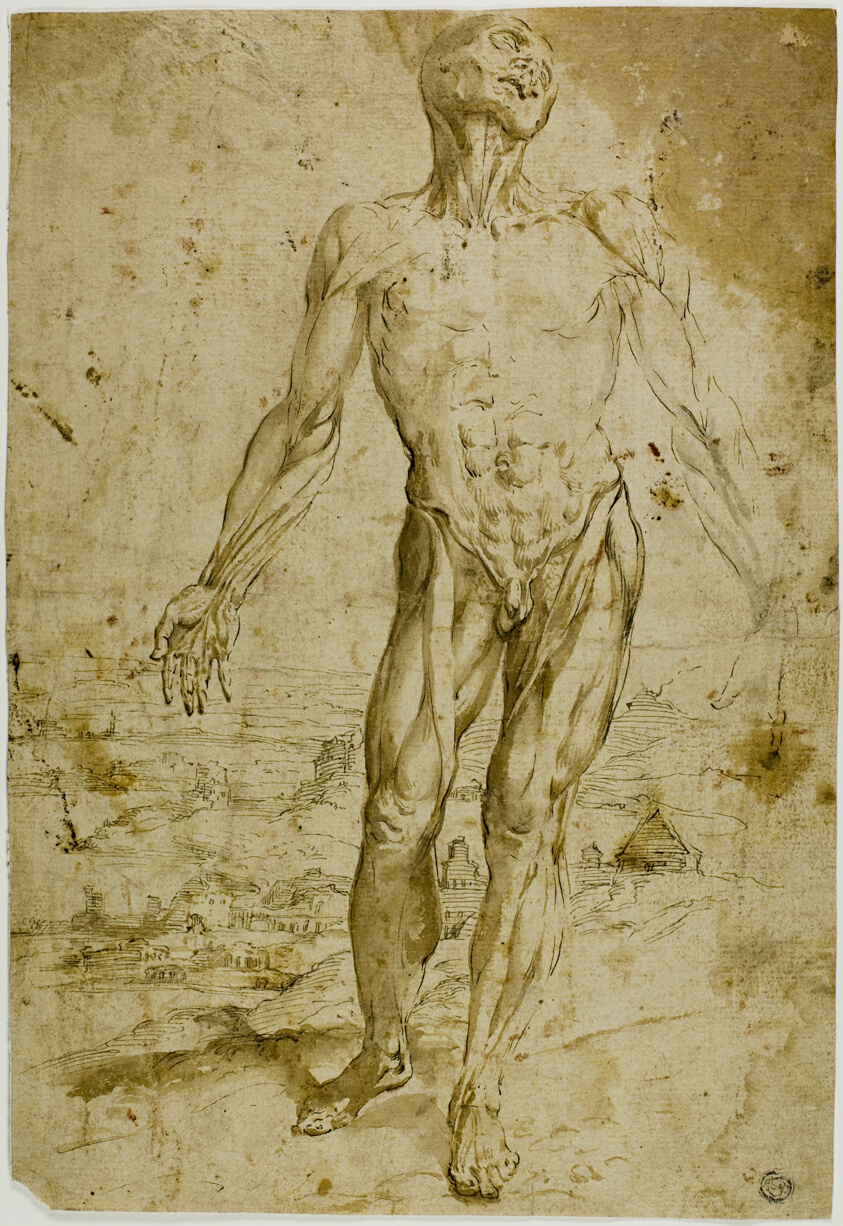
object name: Drawing and Watercolor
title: Écorché before Landscape (recto); Sketches of Standing Male Nude, Seated Child, Stooping Woman (verso)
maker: After Jan Stephan van Calcar (Netherlandish,1499-1546/50); or after Tiziano Vecellio, called Titian (Italian, c. 1488-1576)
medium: Pen and brown ink, with brush and brown and gray wash (recto), and red and black chalk (verso) on cream laid paper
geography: Italy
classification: ink with wash; drawings (visual works); prints and drawing